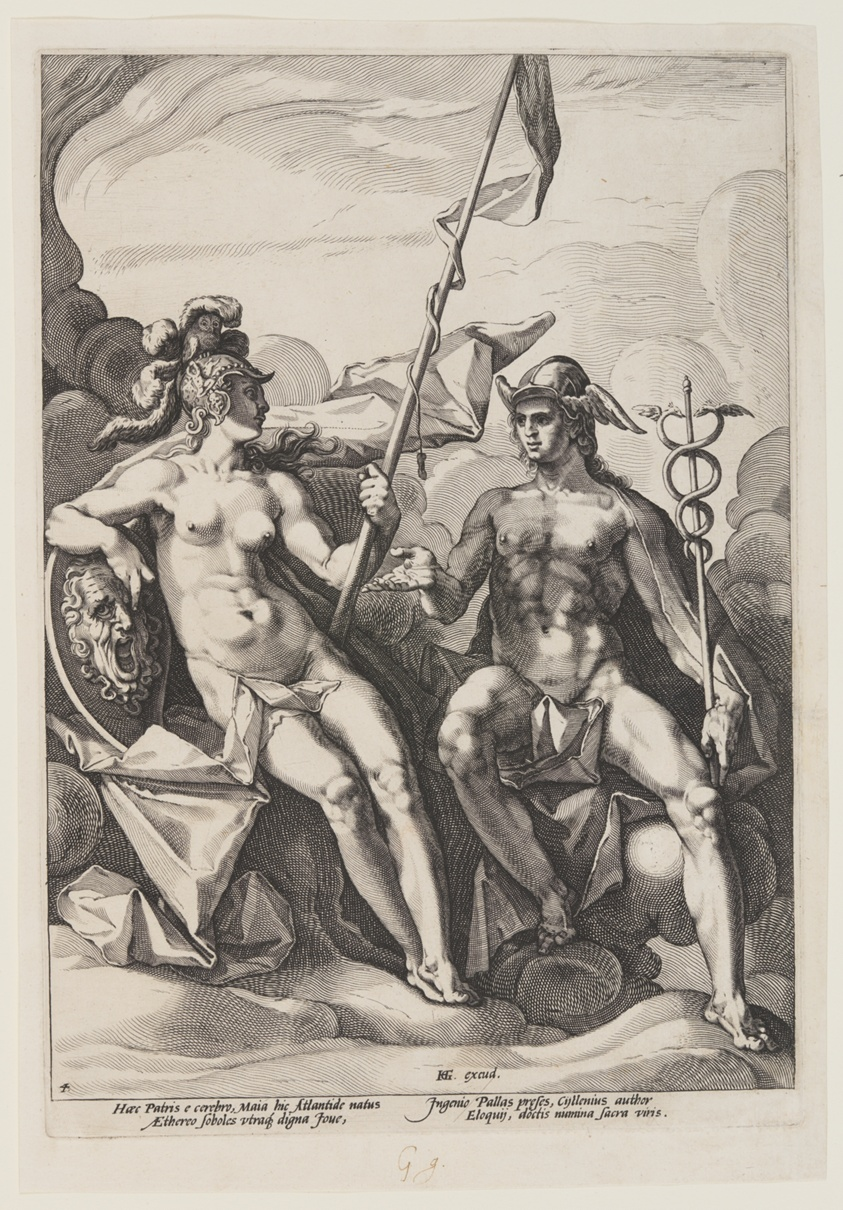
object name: Print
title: Pallas Athena and Mercury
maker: Jacob Matham (Dutch, 1571–1631); after Hendrick Goltzius (Dutch, 1558–1617)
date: c. 1600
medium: Engraving on ivory laid paper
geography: Netherlands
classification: print; paper; prints and drawing; engraving